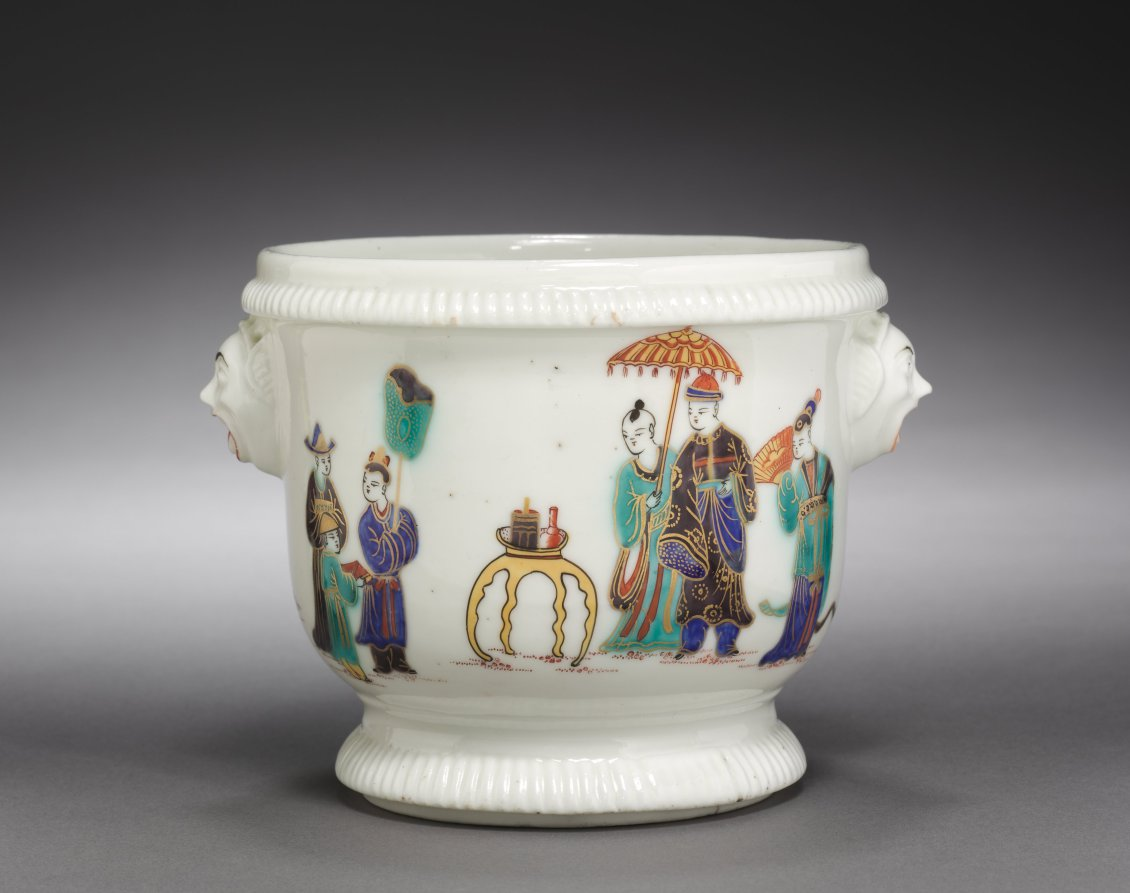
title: Bottle Cooler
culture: France, Saint Cloud, 18th century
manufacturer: Saint Cloud Porcelain Factory (French)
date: c. 1725– 1735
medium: soft-paste porcelain with enamel decoration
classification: Ceramic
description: The form of these cachepots is entirely typical of Saint-Cloud porcelain of about 1725. Their decoration, based upon Chinese porcelains of the so-called "famille-verte" type, is most unusual. Polychromed enamels were not often employed on Saint-Cloud porcelains, and figural scenes are very rare.